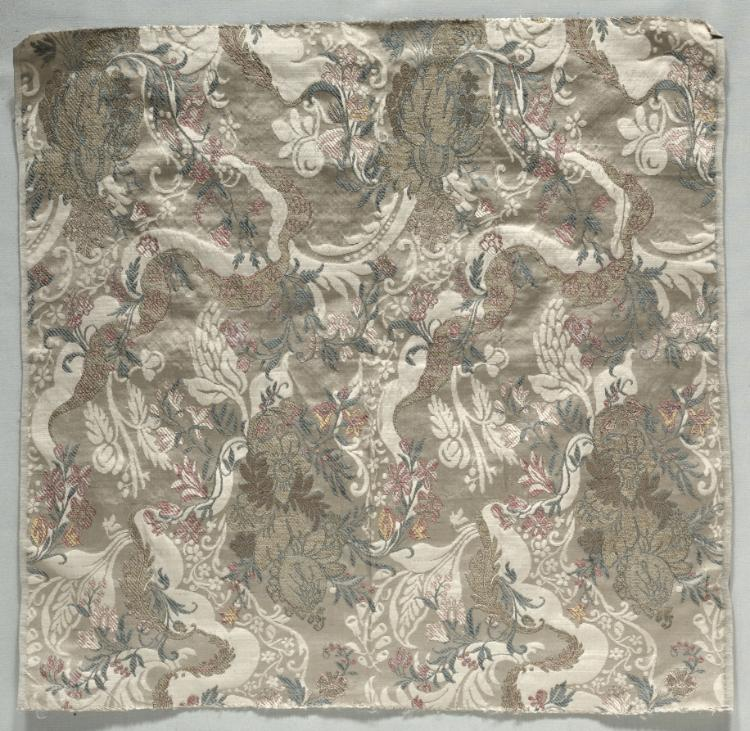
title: Fragment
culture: Italy, early 20th century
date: 1900–1930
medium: brocaded silk damask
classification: Textile